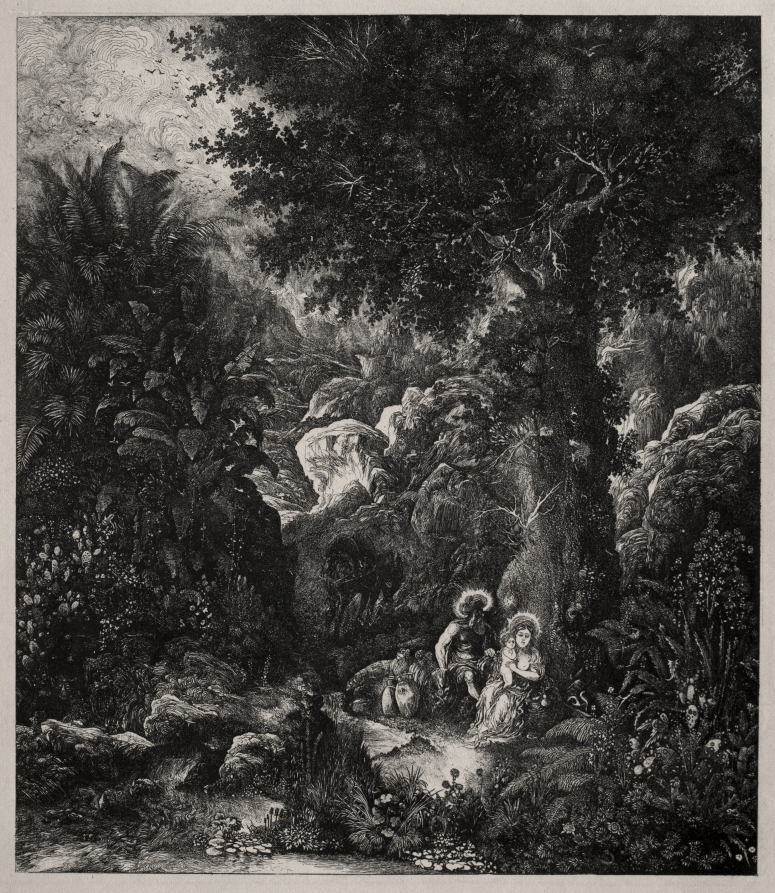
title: Rest on the Flight into Egypt with a Saddled Donkey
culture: France, 19th century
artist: Rodolphe Bresdin (French, 1822–1885)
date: 1871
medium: lithograph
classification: Print